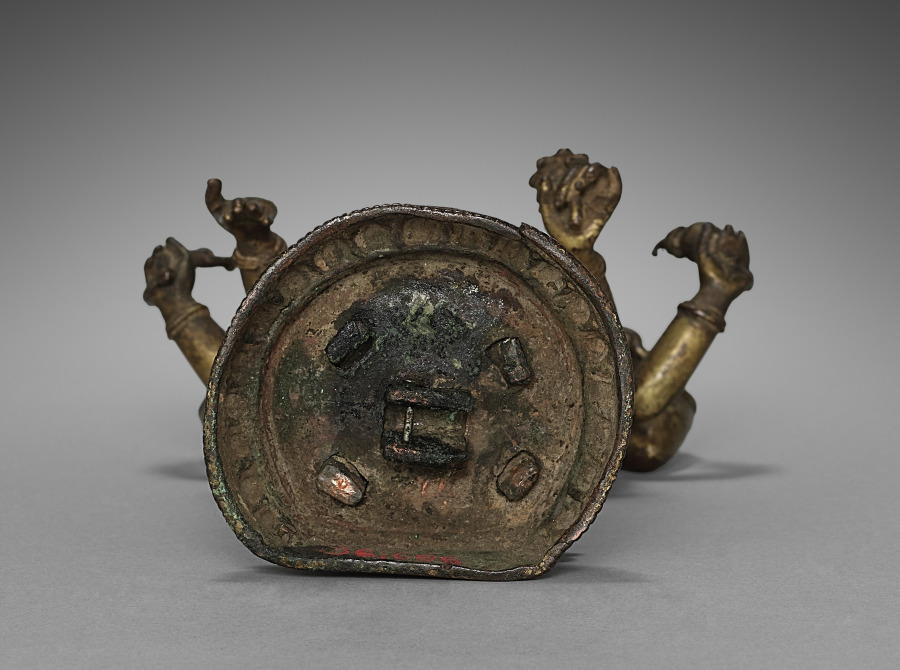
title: Lokeshvara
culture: Nepal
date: 1300s–1400s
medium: gilded copper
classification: Sculpture